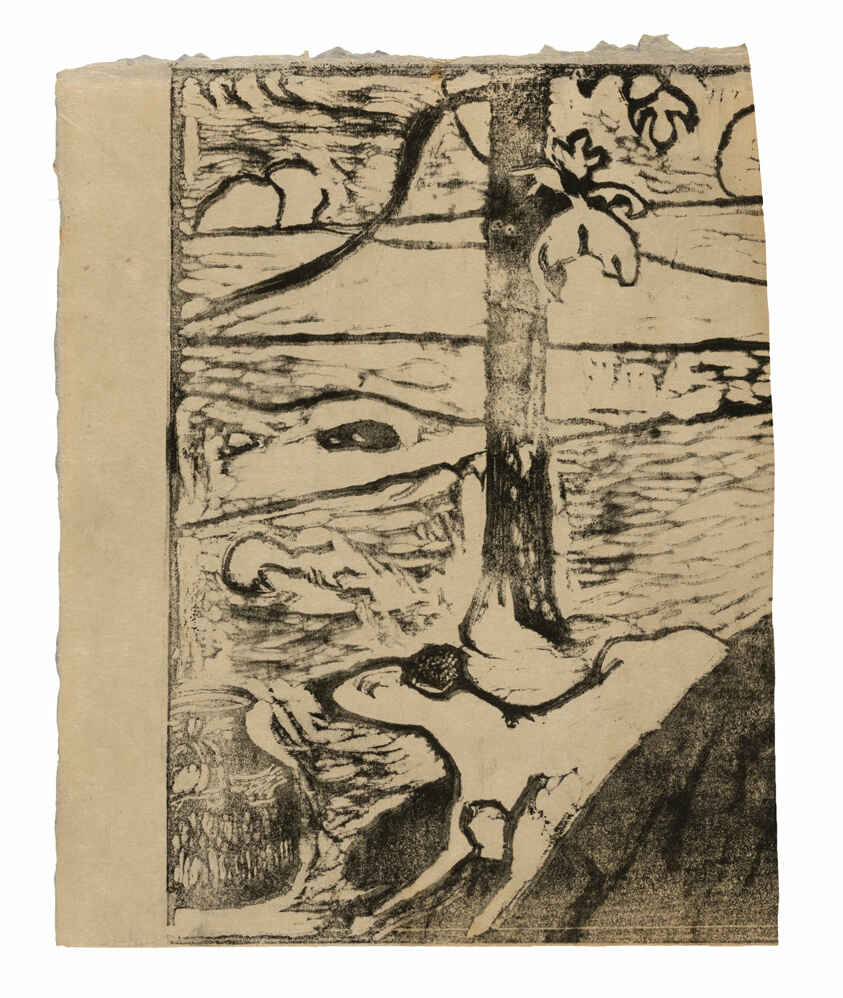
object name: Print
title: Manao tupapau (She Thinks of the Ghost or The Ghost Thinks of Her)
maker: Paul Gauguin (French, 1848-1903)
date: 1894/95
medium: Wood-block print, printed twice in black ink, on cream Japanese paper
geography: France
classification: woodcut; print; prints and drawing